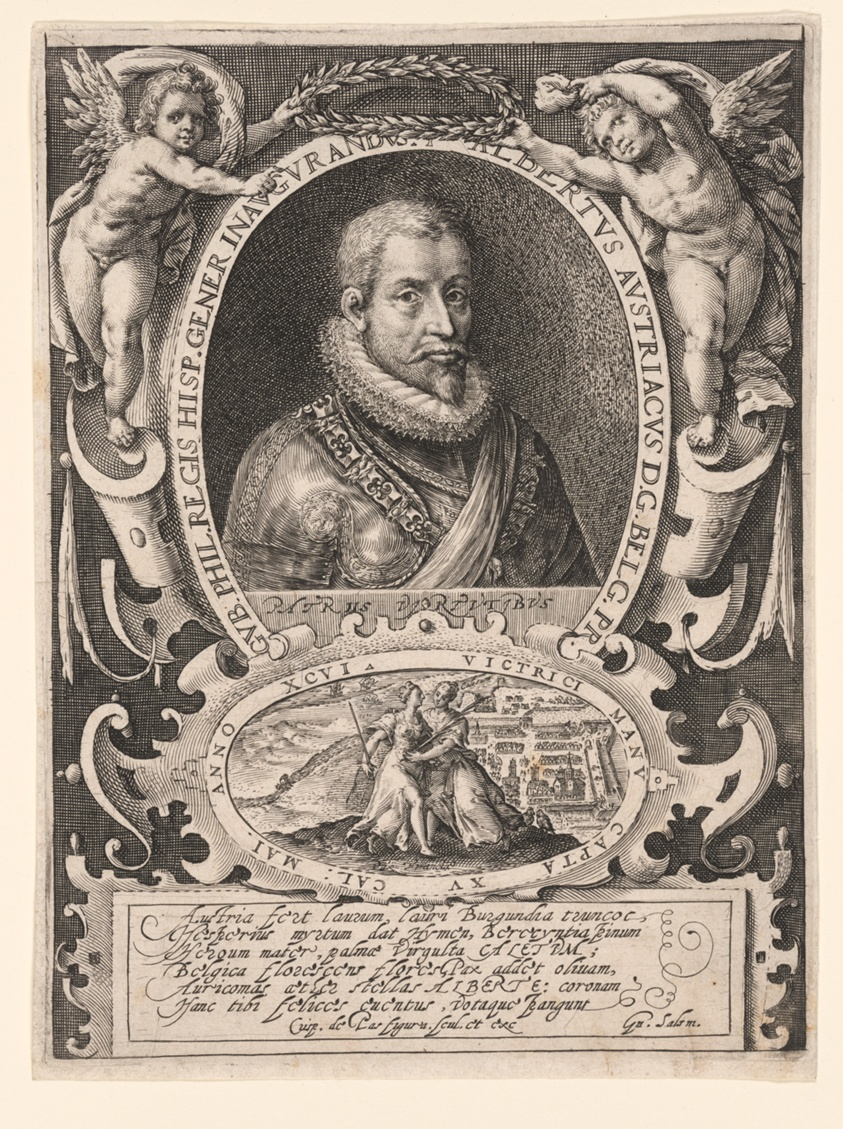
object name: Print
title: Archduke Albert of Austria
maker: Crispijn van de Passe I; Dutch, c. 1565–1637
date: c. 1596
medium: Engraving on paper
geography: Netherlands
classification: engraving; paper; print; prints and drawing